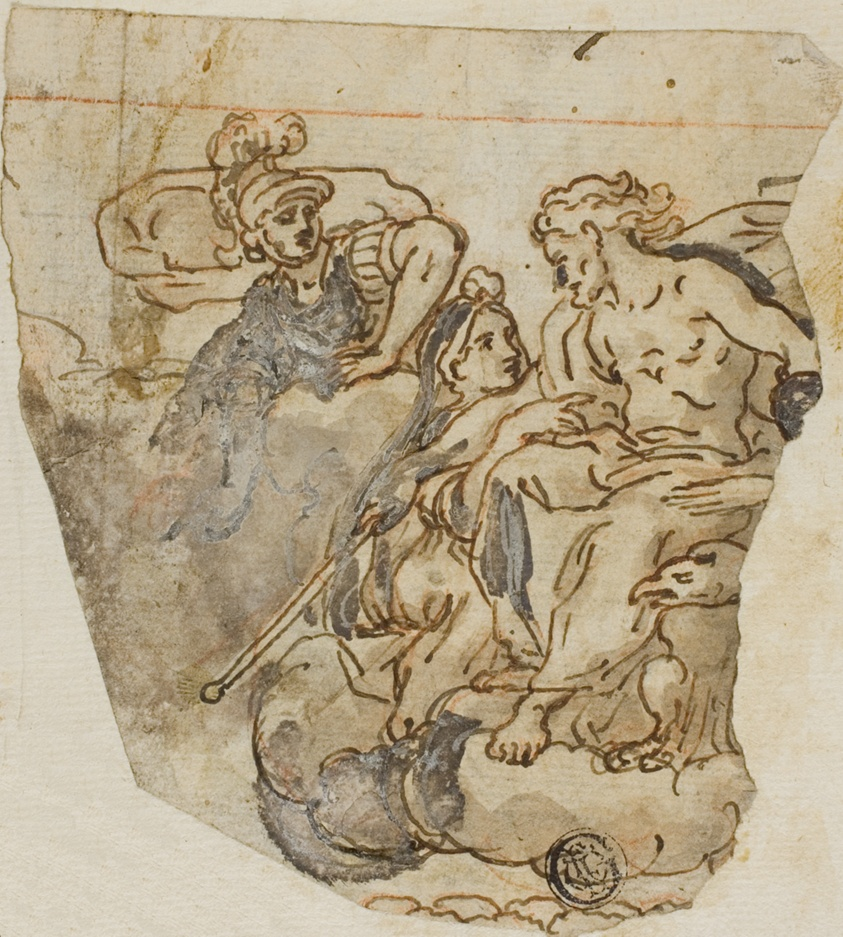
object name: Drawing and Watercolor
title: Zeus and Psyche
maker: Lazzo Tavarone (Italian, 1556-1641); or Andrea Lilio (Italian, 1555-1642)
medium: Pen and brown ink with brush and brown wash, heightened with whtie gouache, over red chalk, on ivory laid paper, laid down on ivory laid paper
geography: Italy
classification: pen and ink drawings; drawings (visual works); prints and drawing